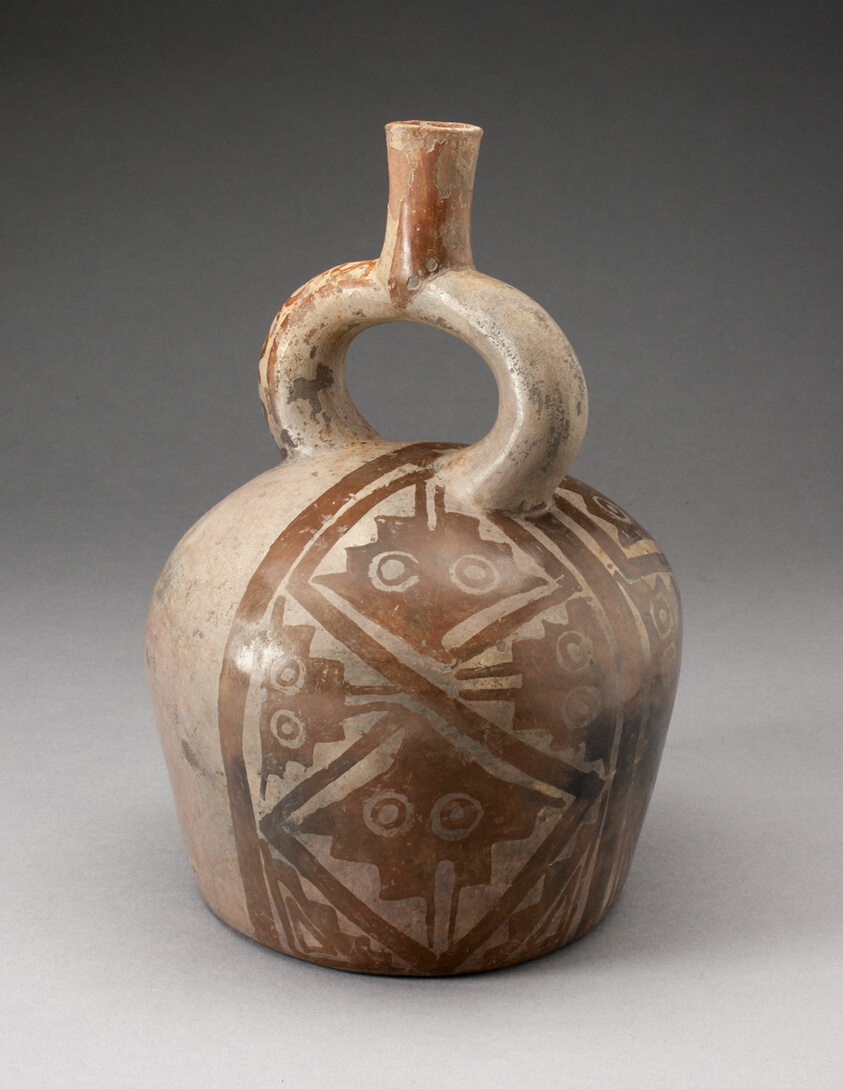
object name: Vessel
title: Stirrup Vessel with one Side Painted with Textile-Like Stepped Motif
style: moche, mochica iii, mochica, early intermediate period, Pre-Columbian, americas, Arts of the Americas, andean, andes, south american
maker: Moche (North coast, Peru)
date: 100 BCE–500 CE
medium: Ceramic and pigment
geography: Peru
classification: earthenware; ceramics; vessel; art of the americas